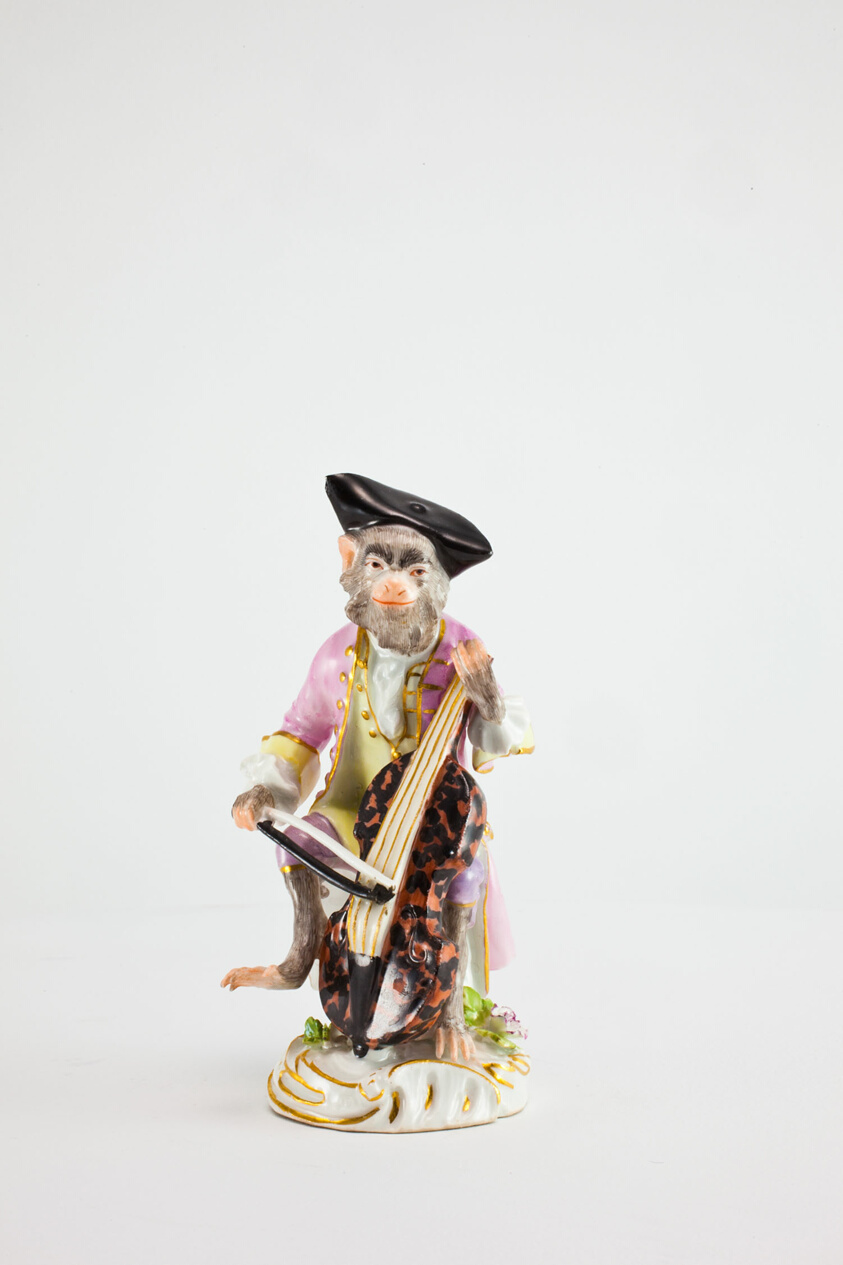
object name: Ceramics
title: Cellist for the Monkey Band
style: Rococo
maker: Meissen Porcelain Manufactory; German, founded 1710; After a model of Kändler or Reinicke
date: c. 1765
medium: Hard-paste porcelain, polychrome enamels, and gilding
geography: Meissen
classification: sculpture; ceramics; porcelain; european decorative arts